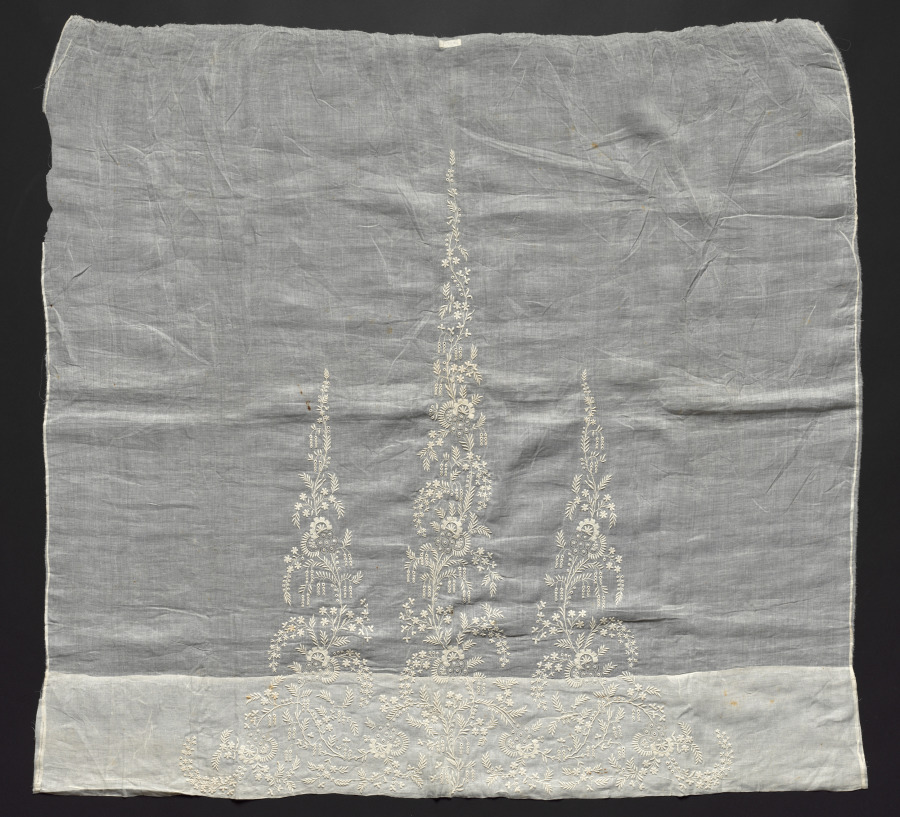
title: Embroidered Dress Front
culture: Madeira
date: c. 1850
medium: Plain weave cotton (est.): embroidered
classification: Embroidery